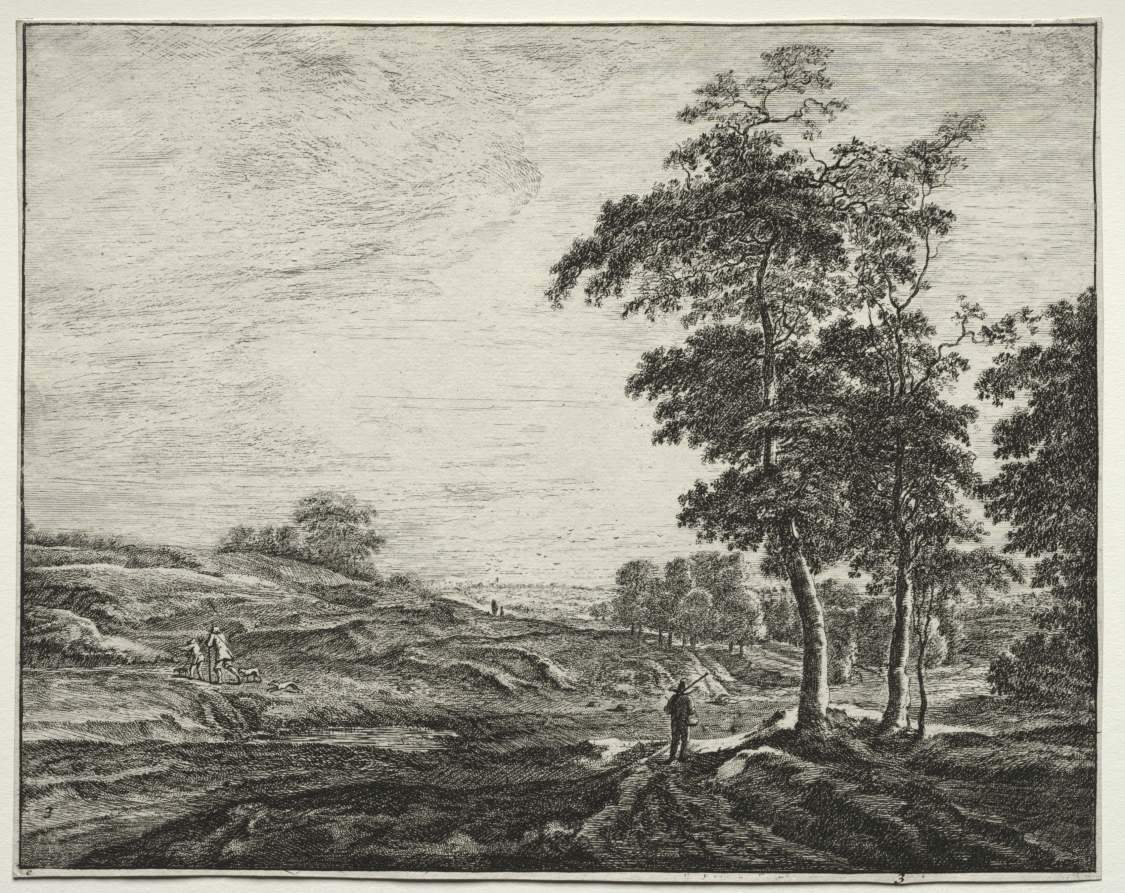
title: Six views in the Wood of the Hague: Plate 3, Peasant Seen from the Back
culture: Netherlands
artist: Roelant Roghman (Dutch, 1627–1692)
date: 1640–52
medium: etching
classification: Print